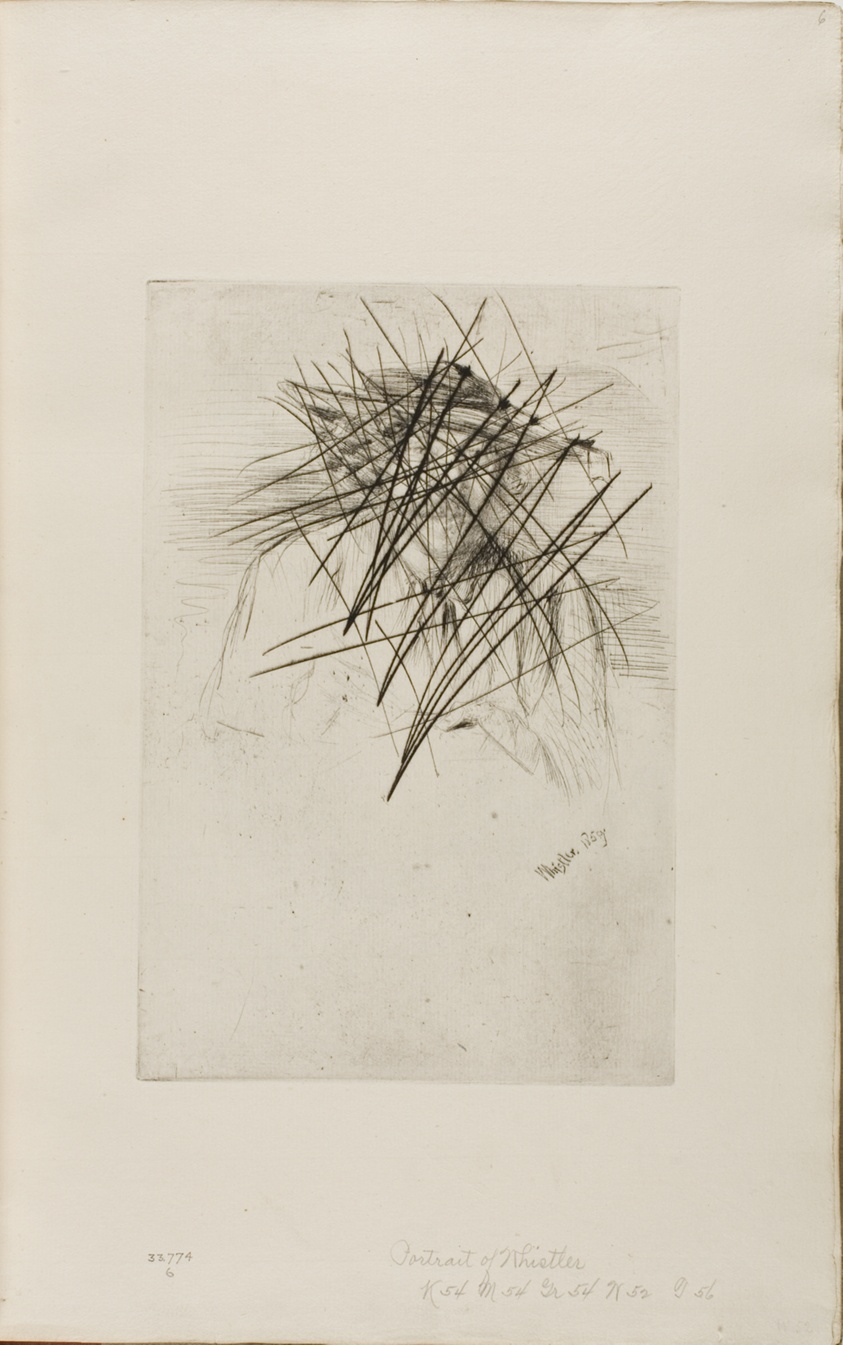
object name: Print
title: Whistler with a Hat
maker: James McNeill Whistler (American, 1834-1903)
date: 1859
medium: Drypoint, with drypoint cancellation, in black ink on ivory laid paper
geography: United States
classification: drypoint; prints and drawing; book; print; paper